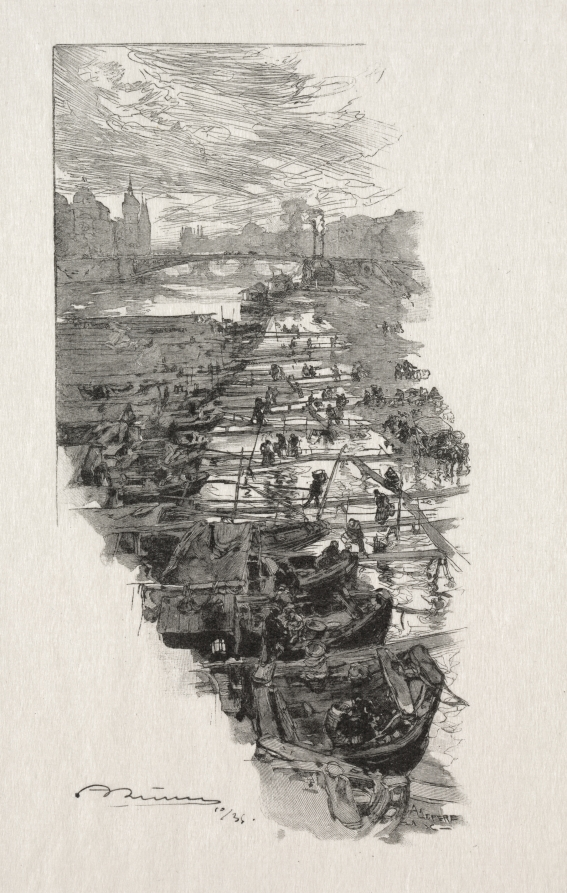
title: Le Marché aux Pommes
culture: France, 19th-20th century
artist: Auguste Louis Lepère (French, 1849–1918)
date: 1890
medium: wood engraving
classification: Print